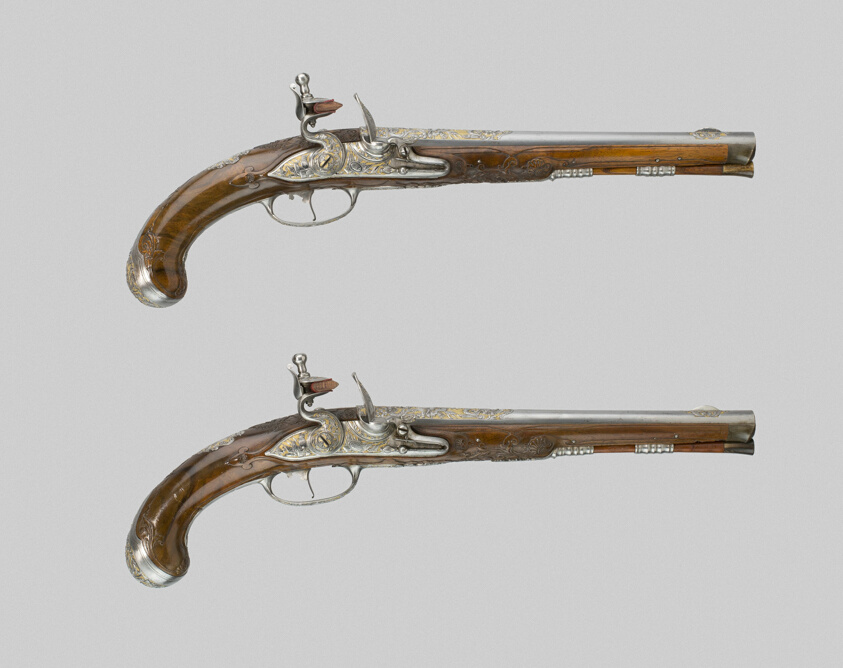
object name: Arms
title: Pair of Flintlock Pistols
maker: German, probably Suhl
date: c. 1730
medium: Walnut, steel, and iron (?)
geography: Suhl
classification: firearm-handgun; arms; arms and armor